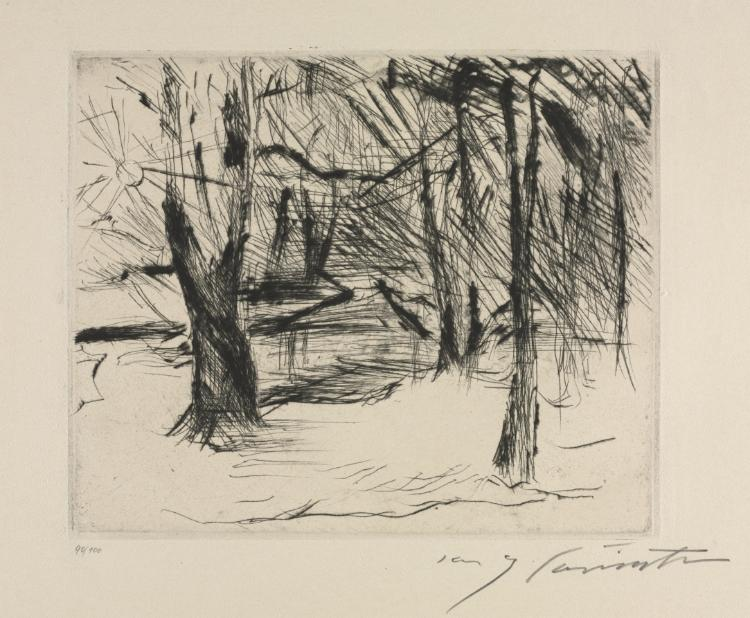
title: Der Tiergarten: Trees with Sun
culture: Germany, 20th century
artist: Lovis Corinth (German, 1858–1925)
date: 1920–1921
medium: drypoint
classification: Print